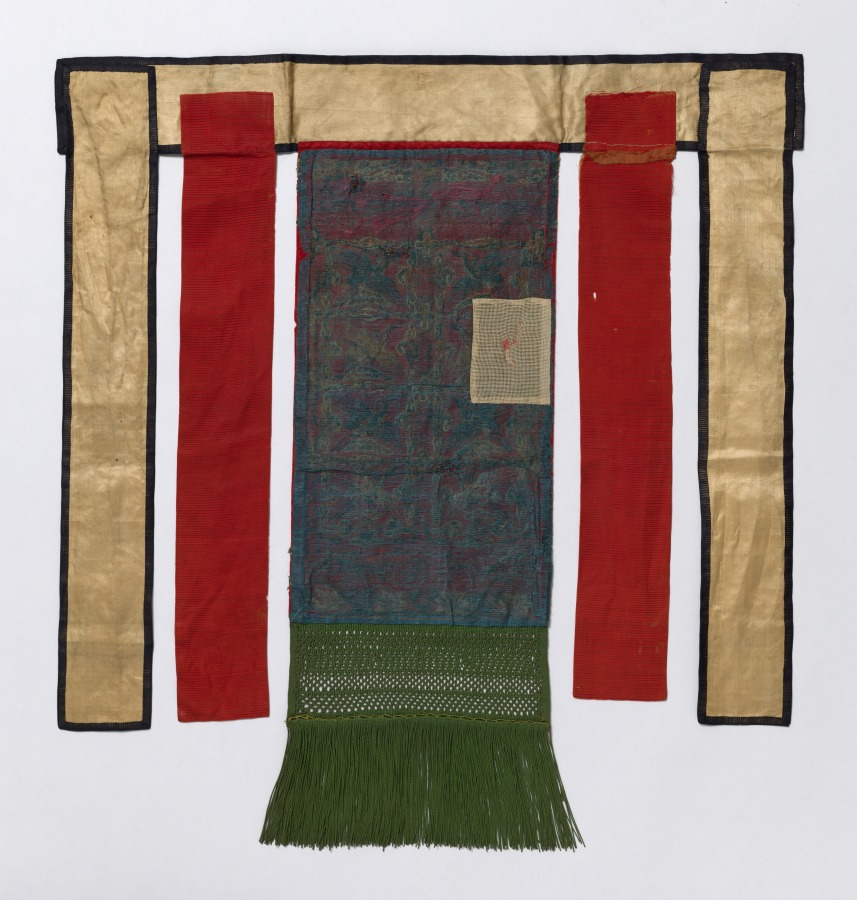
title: Back Apron for the Royal Ceremonial Robe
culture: Korea, Joseon dynasty (1392–1910)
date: late 1800s–early 1900s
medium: red pile weave, wool or silk, embroidered with silk (polychromatic); red silk, gauze weave; white silk, gauze weave; green silk fringe; metal ring embellishments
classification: Garment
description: This is a set of royal ceremonial robe and accessories worn by a high-ranking court official for attending special state ceremonies. The set consists of an inner coat, an outer coat, a skirt, a back apron, a crown, a pair of jade tassels, a tablet, and a belt.